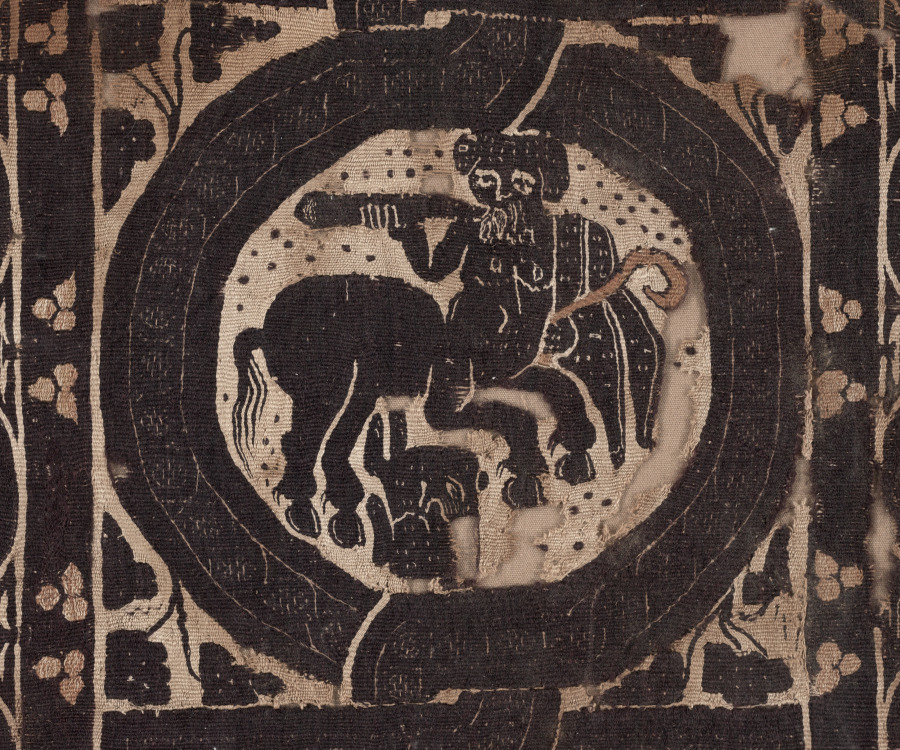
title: Curtain Panel with Scenes of Merrymaking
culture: Egypt, Byzantine period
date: 500s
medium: Linen, undyed; wool: dyed; tapestry weave with supplementary weft wrapping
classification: Textile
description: This large panel conveys merrymaking, wealth, and power through its symbolic imagery and deep purple color. It was originally part of a luxurious wide curtain with similar panels alternating with plain linen panels. Although woven in Christian Egypt, the panel is dominated by pagan subjects. A nude male stands beside a dancing female in transparent clothing in each of the three squares, alternating with centaurs (half-man, half-horse creatures) in roundels. In the central square, Dionysus, the god of wine, holds a grapevine and a weary Hercules leans on his club below. The lively animal imagery conveys wealth because few could afford animals such as lions, bulls, and hares.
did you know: The textile industry drove the Egyptian economy, dominated by the flax plant from which linen is derived.